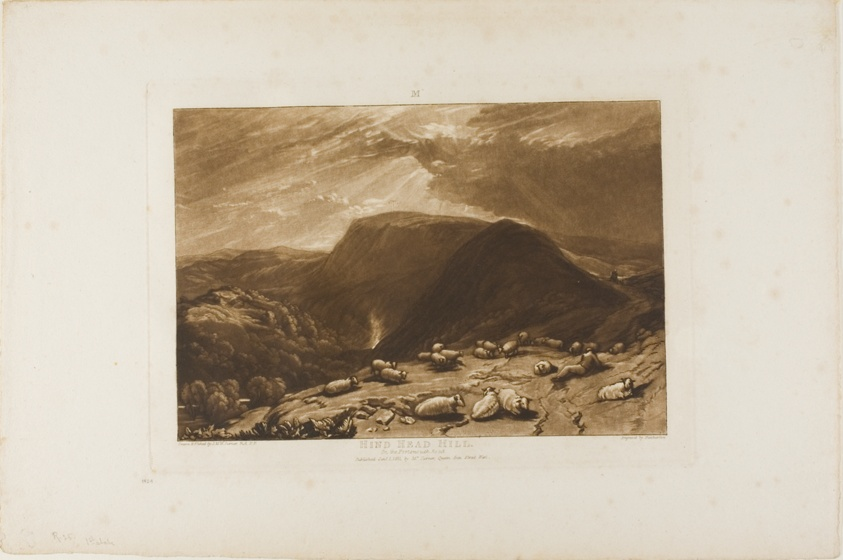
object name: Print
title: Hind Head Hill, plate 25 from Liber Studiorum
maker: Joseph Mallord William Turner (English, 1775-1851); Engraved by Dunkarton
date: published January 1, 1811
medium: Etching and engraving on ivory paper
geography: England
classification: etching; print; prints and drawing